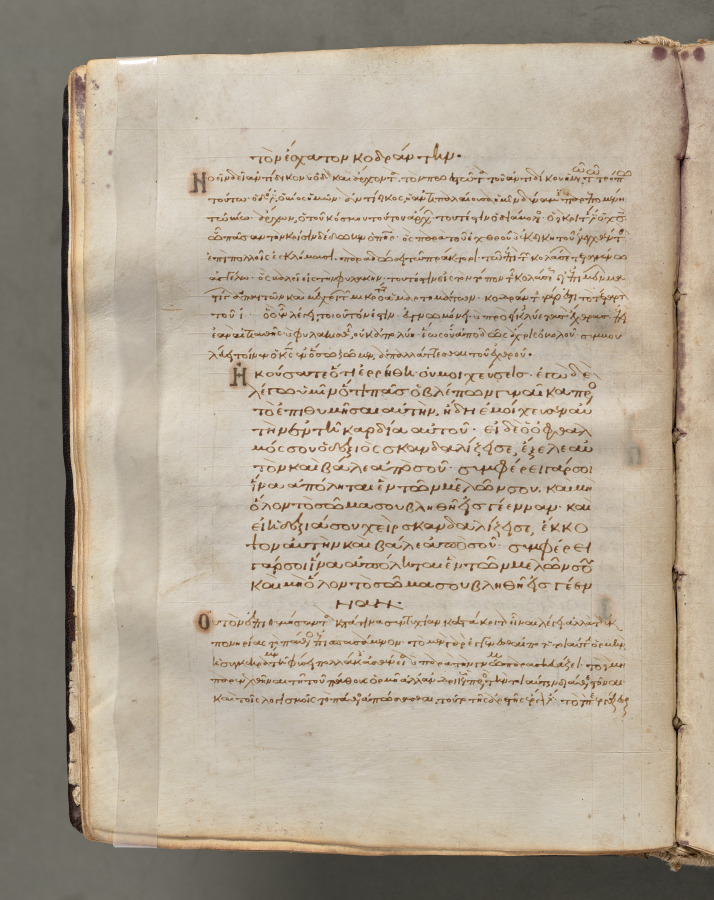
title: Text, folio 21 (verso), from a Gospel Book with Commentaries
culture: Byzantium, Constantinople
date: c. 1000–1100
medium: ink, tempera, and gold on vellum; leather binding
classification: Bound Volume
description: Each of the four gospels in this book opens on a page with brilliantly illuminated borders depicting the author of the text as well as birds-principally peacocks, symbols of the immortality of the soul-and fountains, representing the fountain of life and the salvation of the soul. This volume consists of 428 leaves with texts in Greek. Its level of sophistication suggests that it was probably written and decorated in a monastery in Constantinople.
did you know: Gospel Books were carried in procession through Byzantine churches.